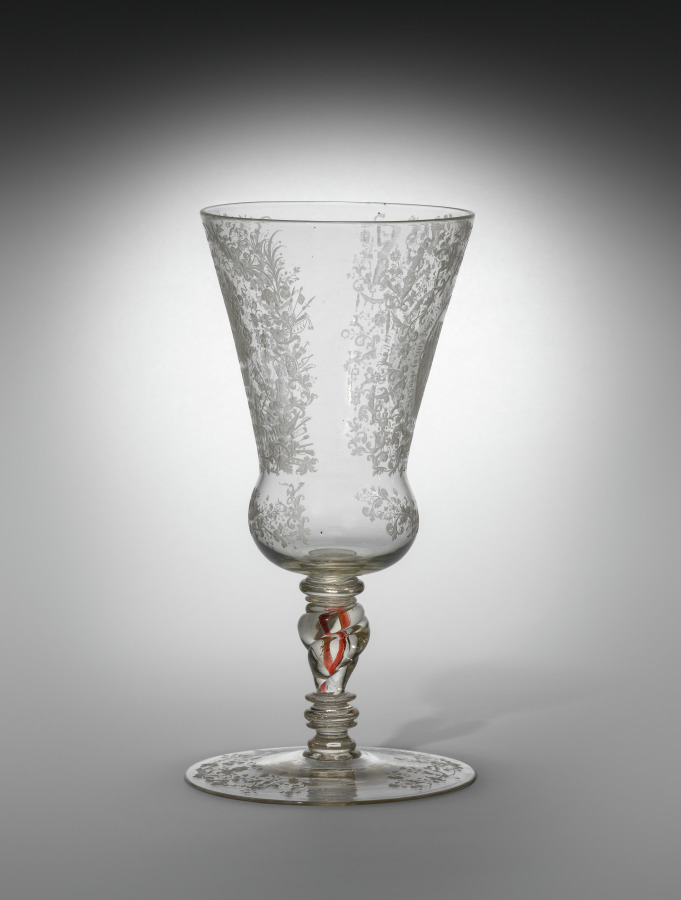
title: Standing Cup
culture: Bohemia, 18th century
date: c. 1715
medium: glass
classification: Glass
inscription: the German inscription engraved around the hunting scene translates as: When sorrow torments us enjoy a glass of wine and also the joy of a hunt; engraved on the opposite side: F.A.K.J.P.V.C.F.Z.S. (Friedrich August Keonig in Polen und Chur Fuerst zu Sachsen).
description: Engraved with arms of Saxony-Poland and Hunting Scene.